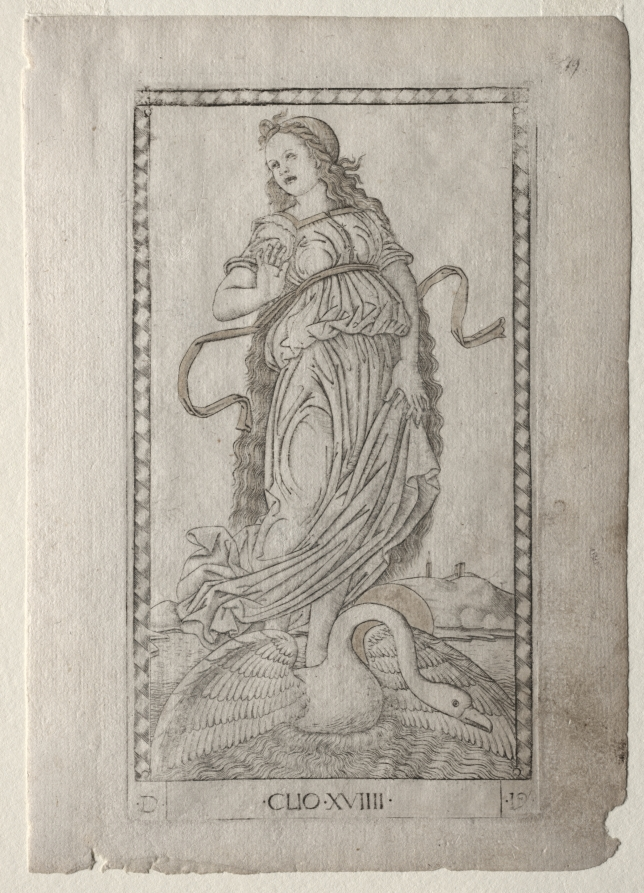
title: Clio (history) (from the Tarocchi series D: Apollo and the Muses, #19)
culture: Italy, Ferrara, 15th century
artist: Master of the E-Series Tarocchi (Italian, active 1460s)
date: before 1467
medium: engraving hand-colored with gold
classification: Print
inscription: Lettered below the image of Clio: ·D· / ·CLIO·XVIIII· / ·19·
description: This engraving is part of the Tarocchi group marked with the letter “D”, and named Apollo and the Muses. In Greek mythology, the nine Muses (Calliope, Urania, Terpsichore, Erato, Polyhymnia, Thalia, Melpomene, Euterpe, and Clio) were the daughters of Zeus, king of the gods, and Mnemosyne, the Titaness of memory. The Muses were goddesses presiding over different branches of the arts and sciences. Their leader and supervisor was Apollo, the god of light, music, prophecy, and poetry. Here, Clio is personified as a full-length female figure, turned to left, and standing on a swan in an imaginary sea landscape. Clio was regarded as the Muse of history.